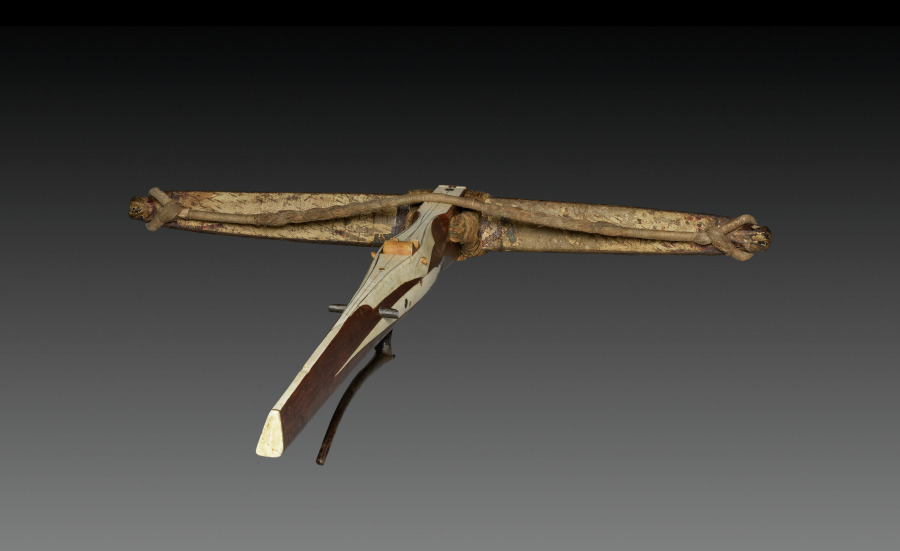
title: Crossbow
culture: Germany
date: c. 1460–70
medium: wood (walnut?) inlaid with bone; horn; iron and steel; composite bow (horn and parchment)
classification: Arms and Armor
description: The cranequin, or winding device sitting on top of the crossbow, made it easier to span for reloading. With a full quiver, a container for bolts and arrows, a hunter could bring home plenty of meat.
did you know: In every army in Europe crossbowmen were considered an elite corps, and as such occupied the central position in battle formations.